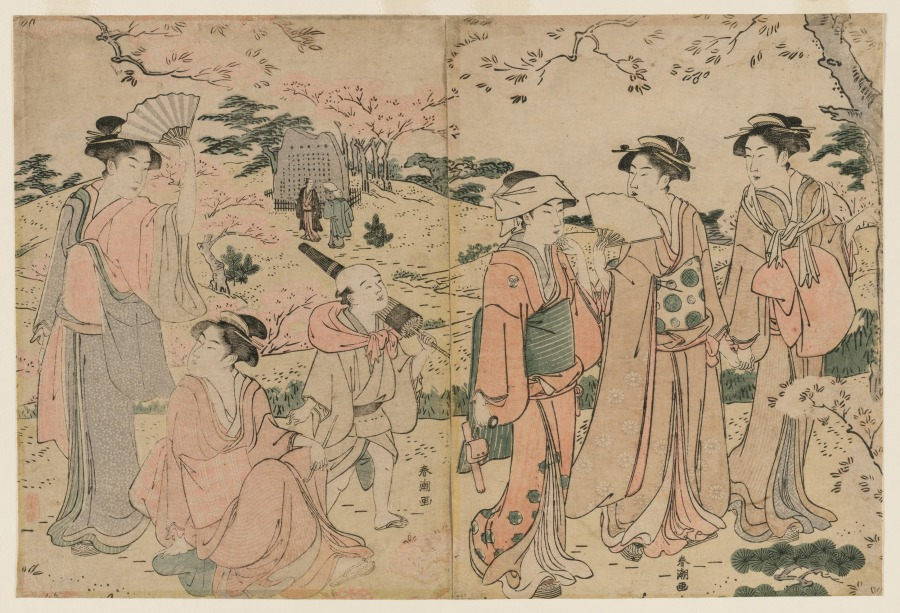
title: Women Viewing Cherry Blossoms at Asukayama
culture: Japan, Edo period (1615–1868)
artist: Katsukawa Shunchō (Japanese)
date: 1780s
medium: color woodblock print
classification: Print